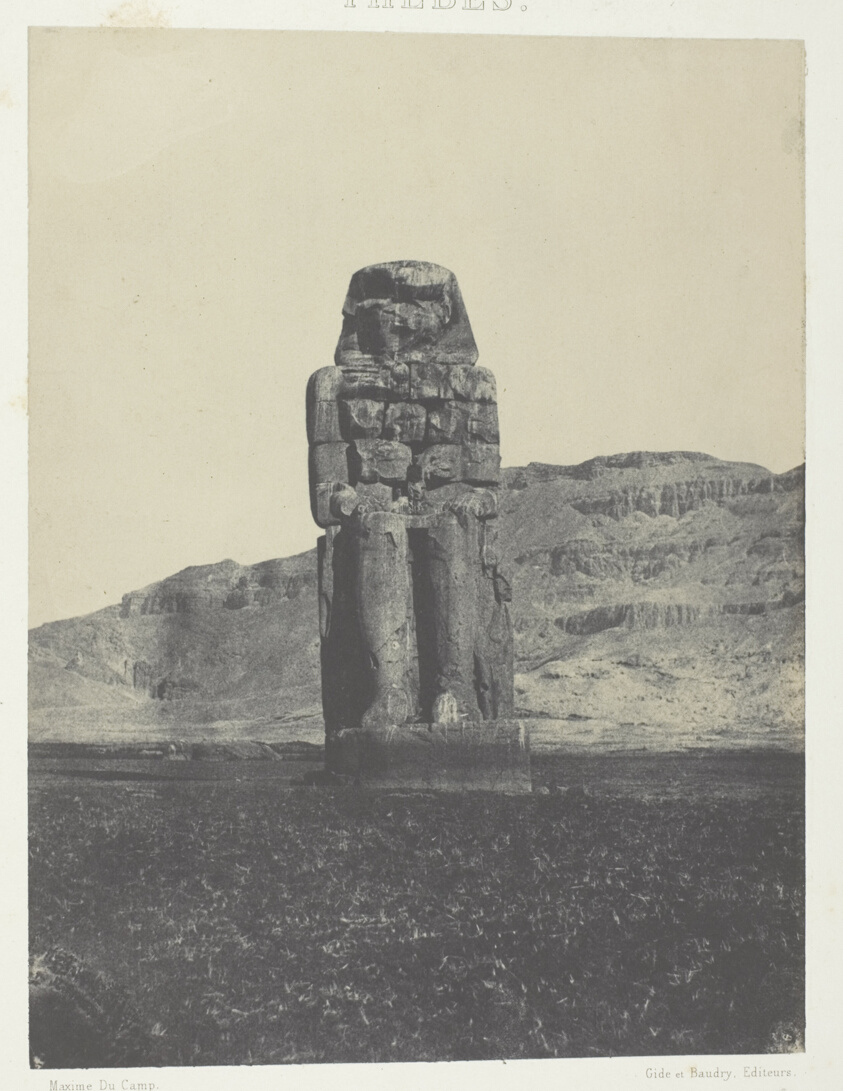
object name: Photograph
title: Gournah, Statue de Memnon; Thèbes, plate 55 from the album "Egypte, Nubie, Palestine et Syrie" (1852)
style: 19th century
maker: Maxime Du Camp (French, 1822–1894)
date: 1849/51, printed 1852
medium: Salted paper print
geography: France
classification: salted paper print; photographic process; photography; photograph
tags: Collected by Hugh Edwards, Egypte, Nubie, Palestine et Syrie